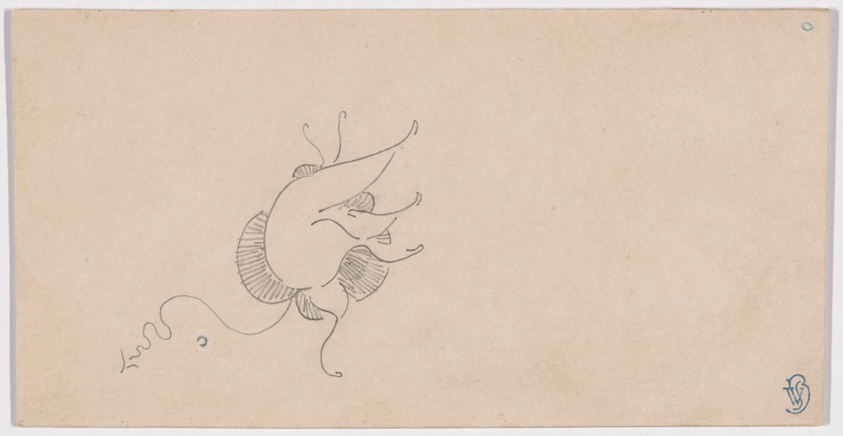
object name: Drawing and Watercolor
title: Butterfly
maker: James McNeill Whistler (American, 1834-1903)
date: c. 1890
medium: Graphite on cream board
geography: United States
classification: graphite; drawings (visual works); prints and drawing; paper